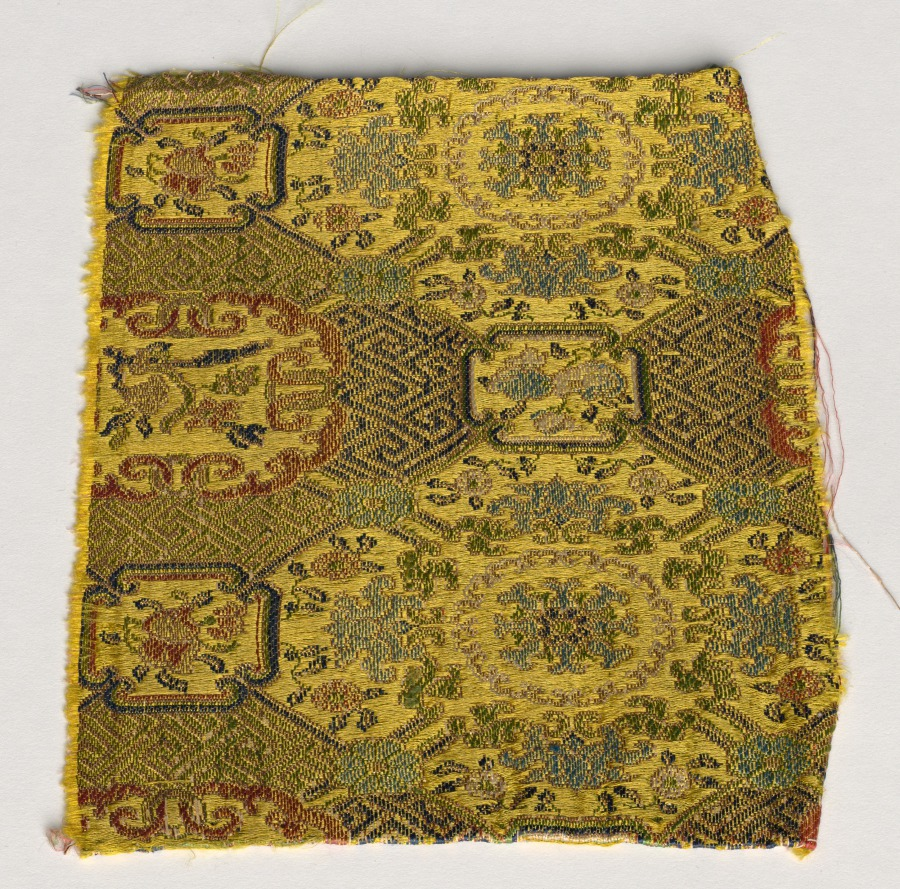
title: Textile Fragment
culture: Japan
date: 1800s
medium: silk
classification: Textile